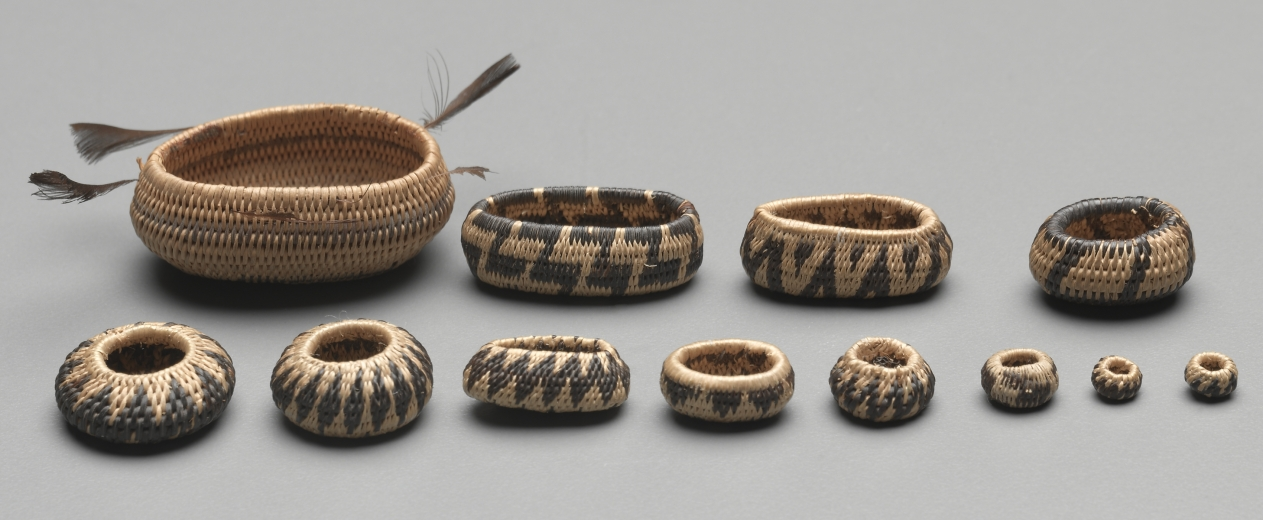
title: Miniature Round Basket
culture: California, Pomo, late 19th-early 20th century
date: late 1800s-early 1900s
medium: plant materials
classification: Basketry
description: Miniature baskets were made to demonstrate the basket-maker’s virtuoso skill, and these tiny marvels seem to be no exception—the smallest are only five millimeters wide but still patterned. For such fine work, dexterity was required as much for preparation of materials as for weaving.